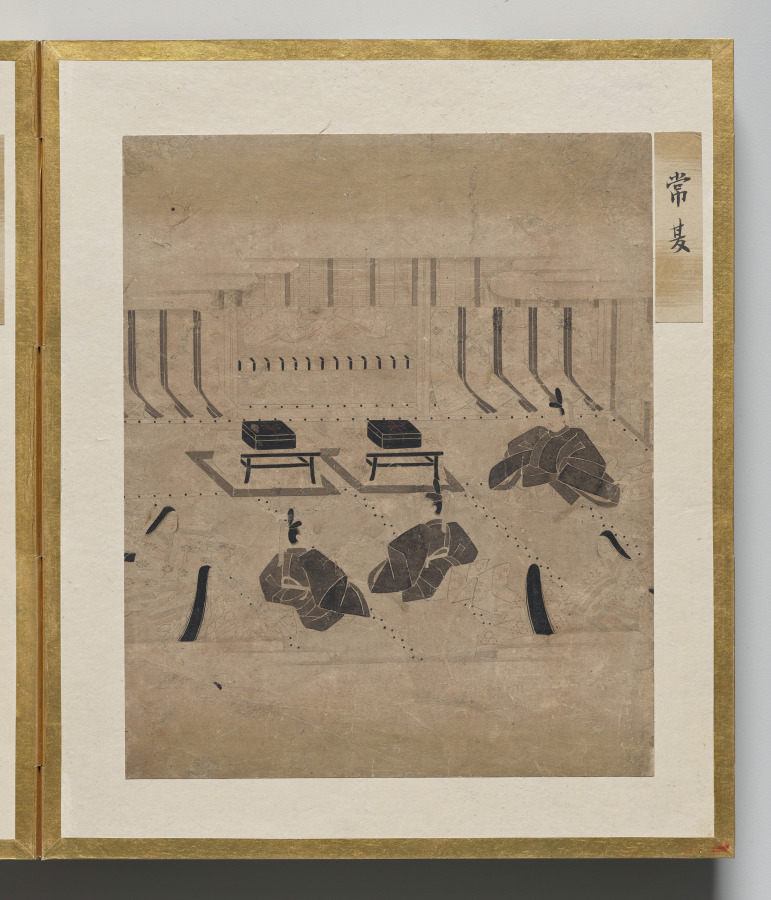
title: Wild Carnation from Album of Illustrations for the Tale of Genji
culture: Japan, Edo period (1615–1868)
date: 1600s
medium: painting in an accordion-style album; ink, light color, and gold on paper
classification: Bound Volume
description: This album contains illustrations for the classic literary work the Tale of Genji, authored in the 1000s by Murasaki Shikibu, an aristocrat of the Heian period (794–1185) court. The scenes are painted in the “white drawing” (hakubyō) mode, in which a fine ink line is used to depict figures and spaces with great subtlety, punctuated only occasionally by traces of red pigment for a character’s lips, a detail of a garment, or a decorative element. These two scenes illustrate episodes from the chapters “Thin Veil of Cloud” (Usugumo) and “Barrier Gate” (Sekiya).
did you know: The illustrations are identified by chapter title in cartouches to the upper right of the paintings.